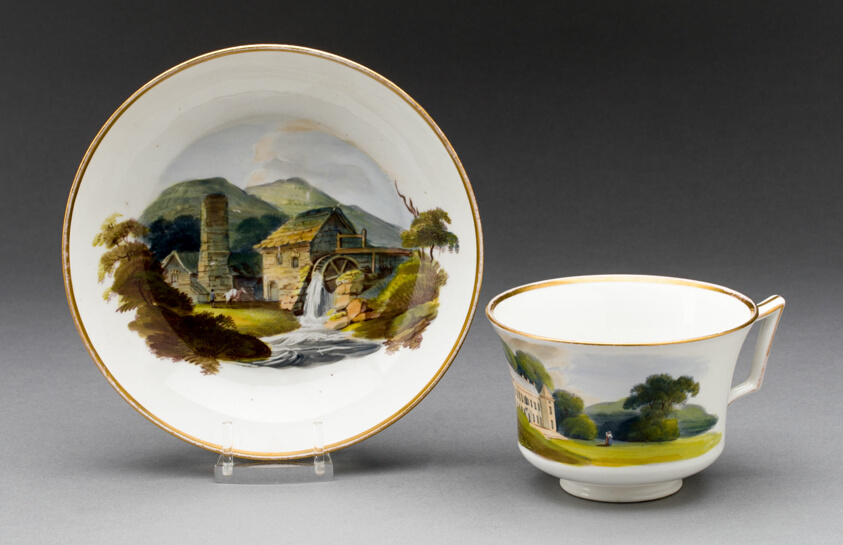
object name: Ceramics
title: Cup and Saucer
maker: Wedgwood Manufactory (England, founded 1759)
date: c. 1815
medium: Porcelain with polychrome enamels and gilding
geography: Burslem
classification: drinking vessel; teaware; porcelain; european decorative arts; ceramics